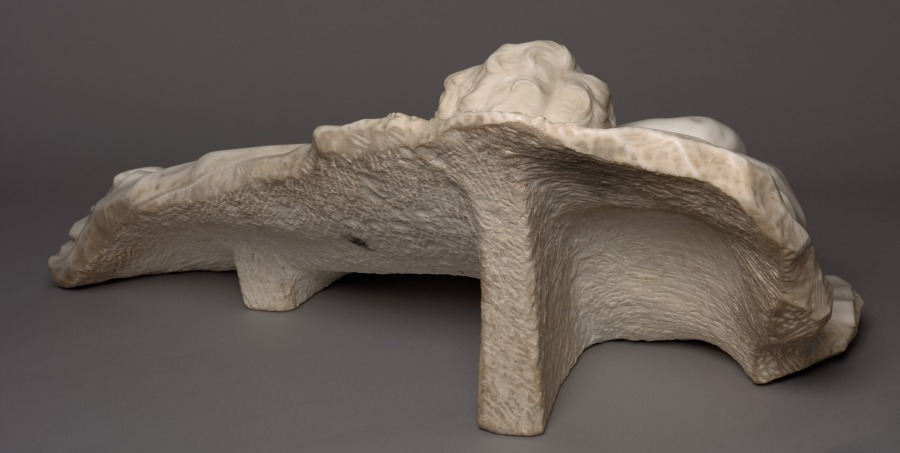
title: Sleeping Christ Child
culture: Italy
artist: Filippo Parodi (Italian, 1630–1702)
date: c. 1675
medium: marble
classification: Sculpture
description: Christ—no longer an infant, but a young child—sprawls on a bed of straw, his head thrown back in slumber and his right arm dangling. The simple radiance framing his head indicates his divinity. Representations of the sleeping Christ child were enduringly popular, not only because of the subject’s inherent charm, but sleep, as a metaphor for death, encouraged pious Christians to meditate on Christ’s humanity and his eventual suffering and death. Filippo Parodi’s Sleeping Christ Child beguiles with lifelike detail. Parodi used varying degrees of polish to differentiate surface textures: Christ’s body is burnished to a soft gleam, while his hair and the straw are more roughly carved, absorbing rather than reflecting the light. Parodi exploited the sensuous and tactile possibilities of the marble to enhance the emotional impact of his piece, a tactic learned from the master of Italian Baroque sculpture, Gianlorenzo Bernini.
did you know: Tender images of the Christ child sleeping encouraged devout Christians to meditate on Christ’s humanity.